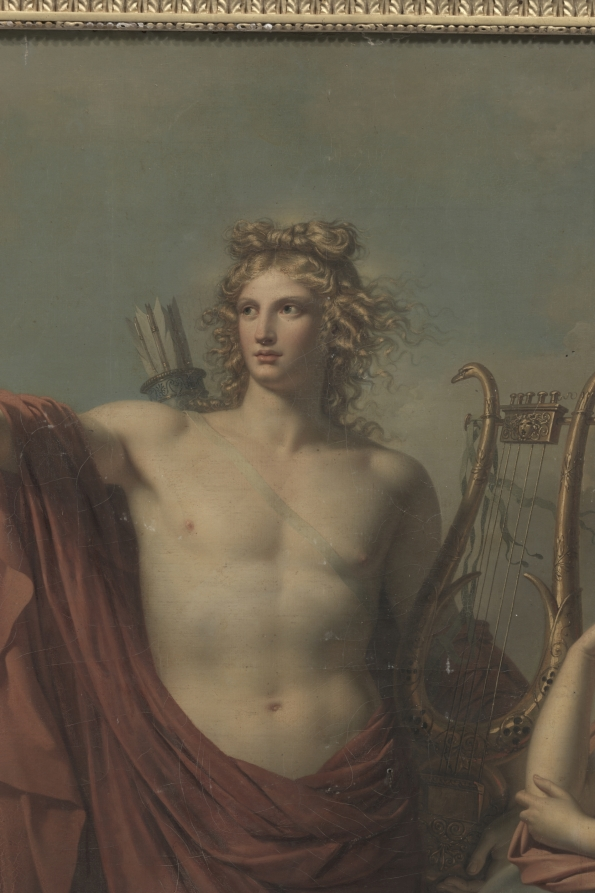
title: Apollo, God of Light, Eloquence, Poetry, and the Fine Arts with Urania, Muse of Astronomy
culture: France, late 18th century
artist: Charles Meynier (French, 1768–1832)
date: 1798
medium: oil on canvas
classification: Painting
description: A recipient of the Grand Prix de Rome in 1789, Charles Meynier became a member of the Académie des Beaux-Arts in 1815 and painted large ceiling decorations at the Louvre and numerous pictures glorifying the Napoleonic legend. Erato, Muse of Lyrical Poetry belongs to a cycle of five paintings executed to fulfill a commission from businessman François Boyer-Fonfréde. They were intended to decorate his home in his native Toulouse and constitute a rare instance of a complete cycle of major paintings that remain intact rather than being split up and separately dispersed.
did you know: Urania leans on a starry orb, indicating her role as the muse of astronomy.